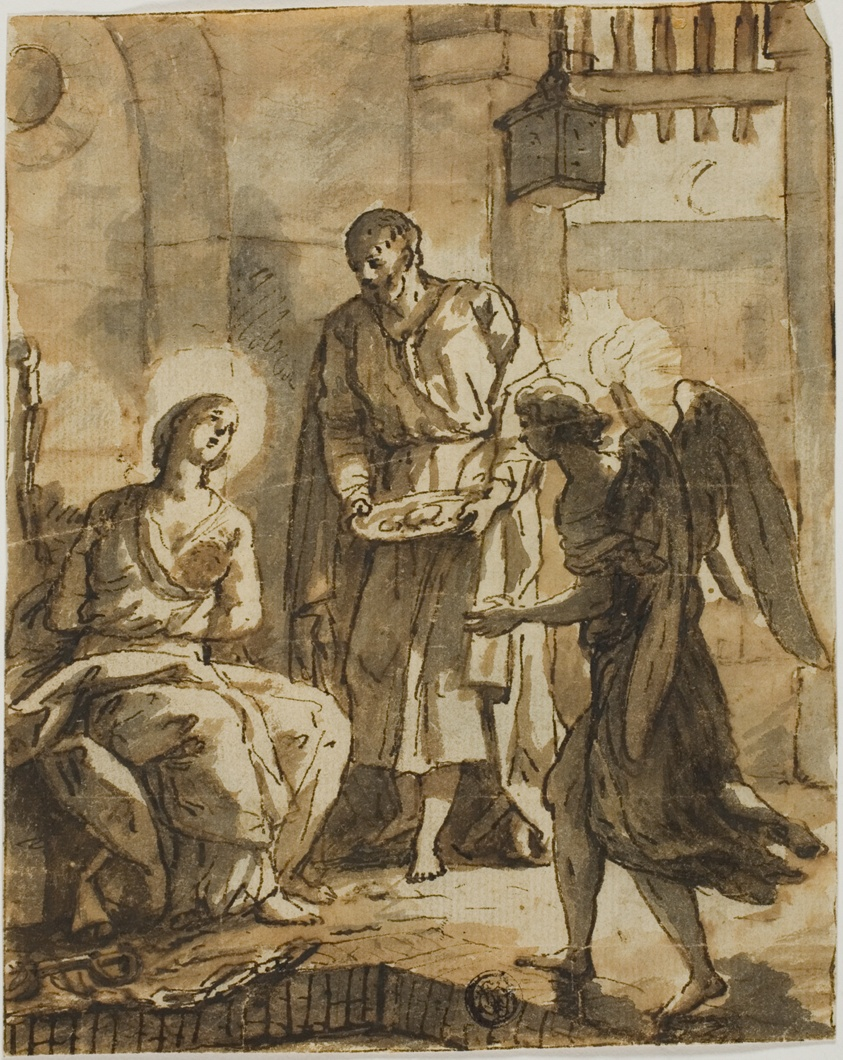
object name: Drawing and Watercolor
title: Saint Peter Visiting Saint Agatha in Prison and Healing her Wounds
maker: Anton Raffael Mengs (German, 1728-1779); or Unknown Artist (Italian, 1650-1749)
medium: Pen and brown ink, with brush and brown and gray wash, on cream laid paper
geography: Germany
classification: ink or chalk wash; drawings (visual works); prints and drawing